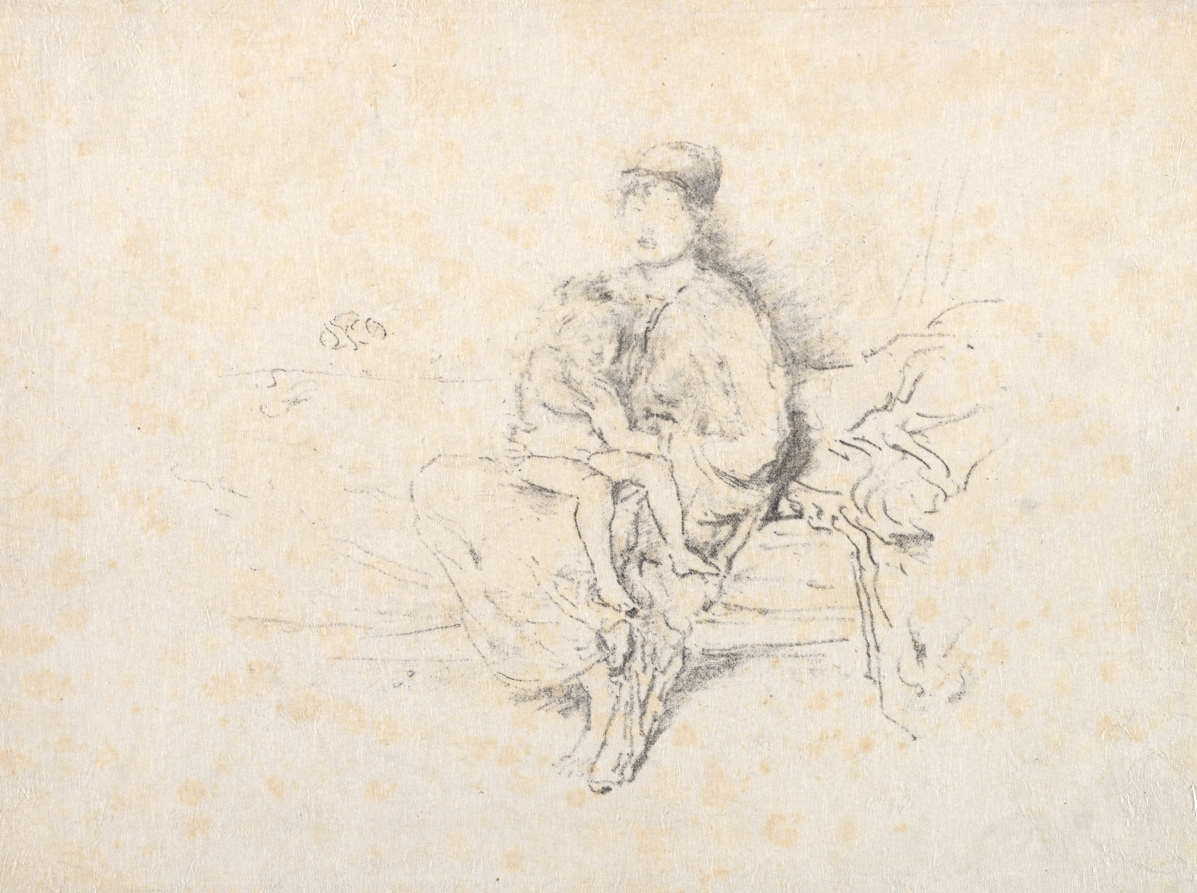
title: Mother and Child, No. 2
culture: America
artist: James McNeill Whistler (American, 1834–1903)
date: 1896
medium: lithograph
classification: Print